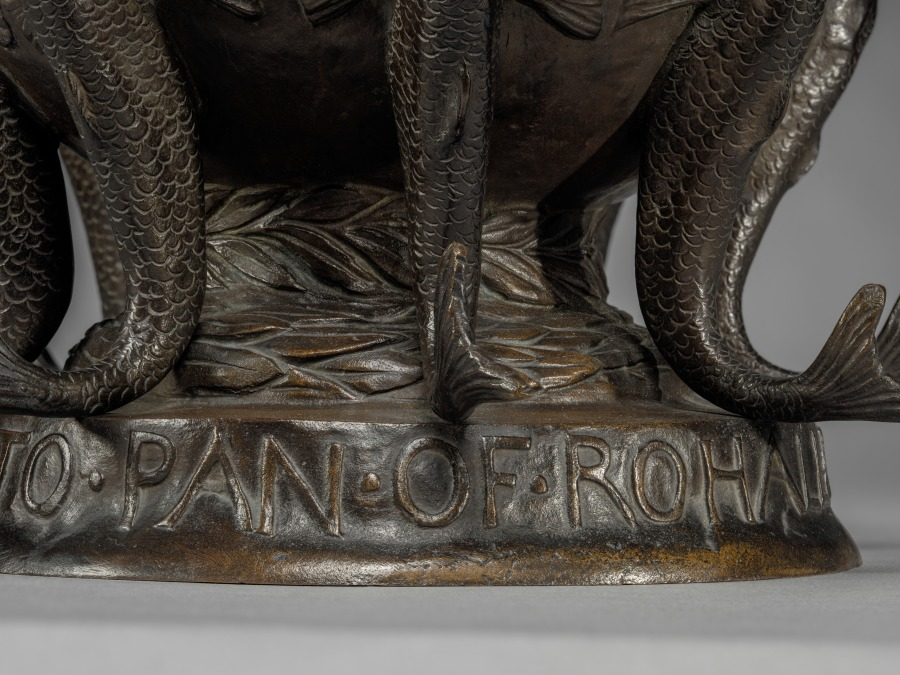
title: Pan of Rohallion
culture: America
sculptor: Frederick William MacMonnies (American, 1863–1937)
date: 1890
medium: bronze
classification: Sculpture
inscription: Signed on globe: Frederick MacMonnies, Paris 1890. © 1894. Inscribed around base: TO PAN OF ROHALLION ANNO DOMINI MDCCCLXL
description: Rohallion in the title refers to the name of an estate in New Jersey, whose owner commissioned MacMonnies to create a large fountain of this design for a garden pool. Later, the artist made several smaller versions, such as this example. Here, the ancient Greek god Pan plays his musical pipes while standing on an orb supported by fish.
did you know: The character of Peter Pan, including his flute playing, references the Greek god Pan.